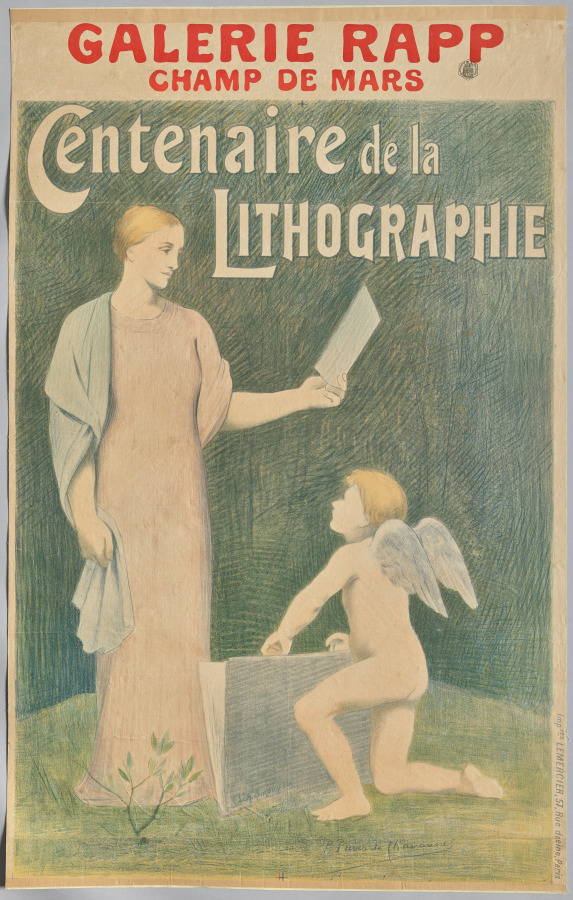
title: Centennial of Lithography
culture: France, late 19th Century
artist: Pierre Puvis de Chavannes (French, 1824–1898)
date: 1895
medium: lithograph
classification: Print